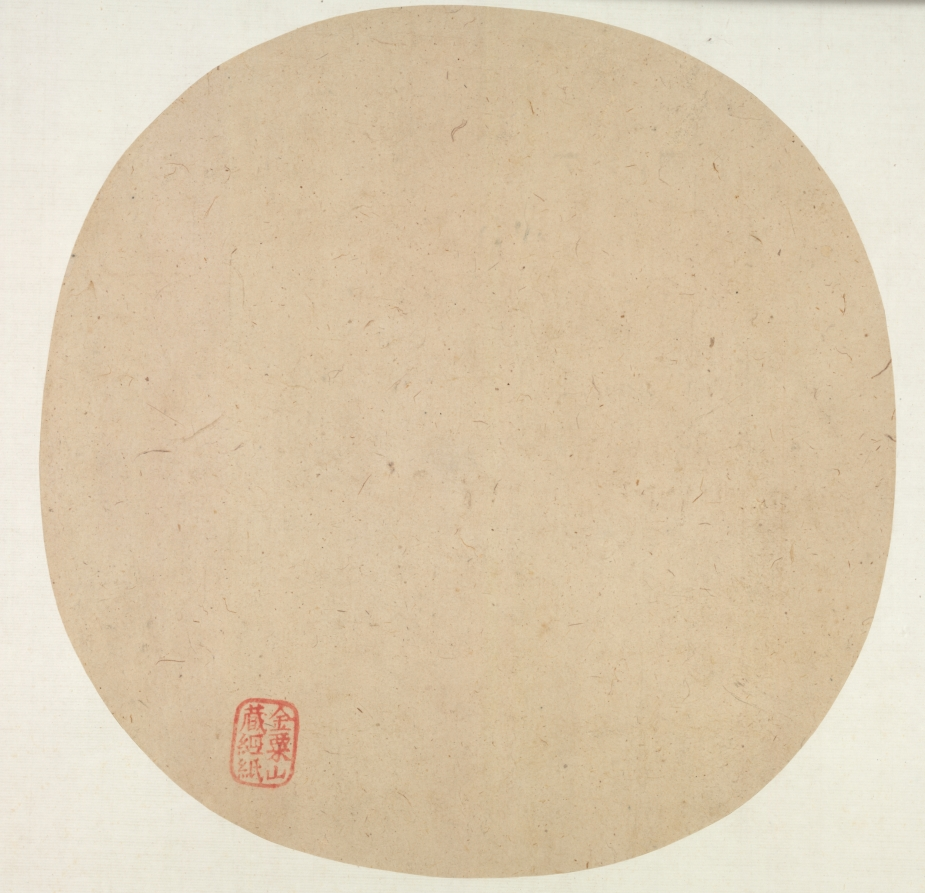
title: Listening to the Qin (Zither)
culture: China, Southern Song dynasty (1127-1279)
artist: Liu Songnian (Chinese, c. 1150-after 1225)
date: 1150–after 1225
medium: Album leaf; ink and slight color on silk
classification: Painting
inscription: 劉松年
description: Listening to the Qin recalls the story of Bo Ya, a musician who loved to play the qin (a seven-stringed zither) for Zhong Ziqi, who was a discerning listener. The cool shade of the pine trees and the incense wafting from the burner complemented the atmosphere created by the music. After Zhang died, Bo refused to play the instrument ever again. The intimate format of the album leaf focuses on the music as the key to stir the heart and soul of both player and listener.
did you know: The three figures are painted with "nail-head and mouse-tail" brushstrokes.